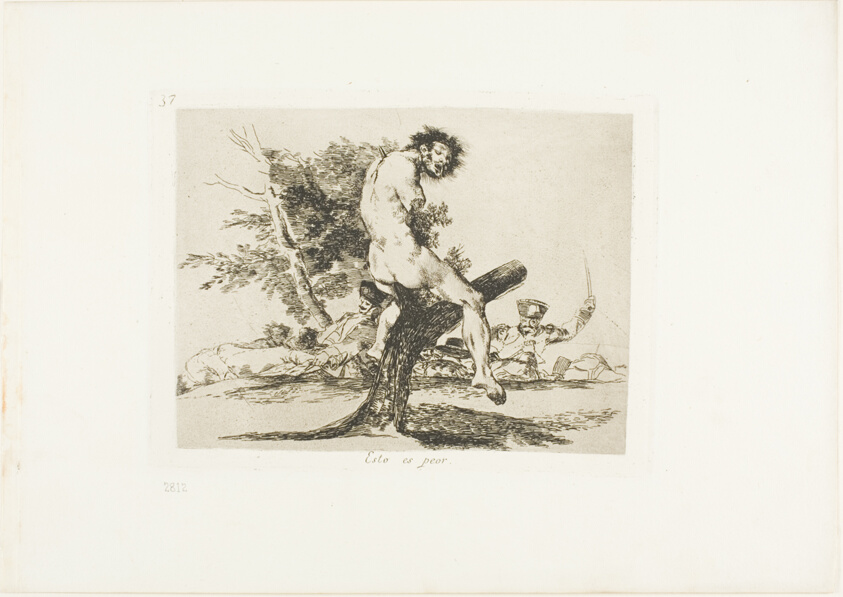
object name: Print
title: This is Worse, plate 37 from The Disasters of War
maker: Francisco José de Goya y Lucientes (Spanish, 1746-1828)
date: 1812/15, published 1863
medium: Etching, lavis and drypoint on ivory wove paper with gilt edges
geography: Spain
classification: etching; print; prints and drawing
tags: war